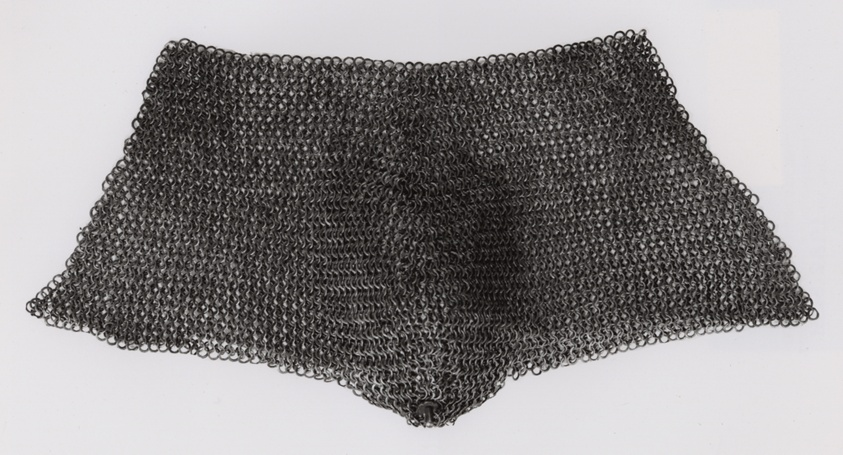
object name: Armor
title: Front of Mail Breech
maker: European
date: 15th century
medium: Steel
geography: Europe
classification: suit-element; armor; arms and armor